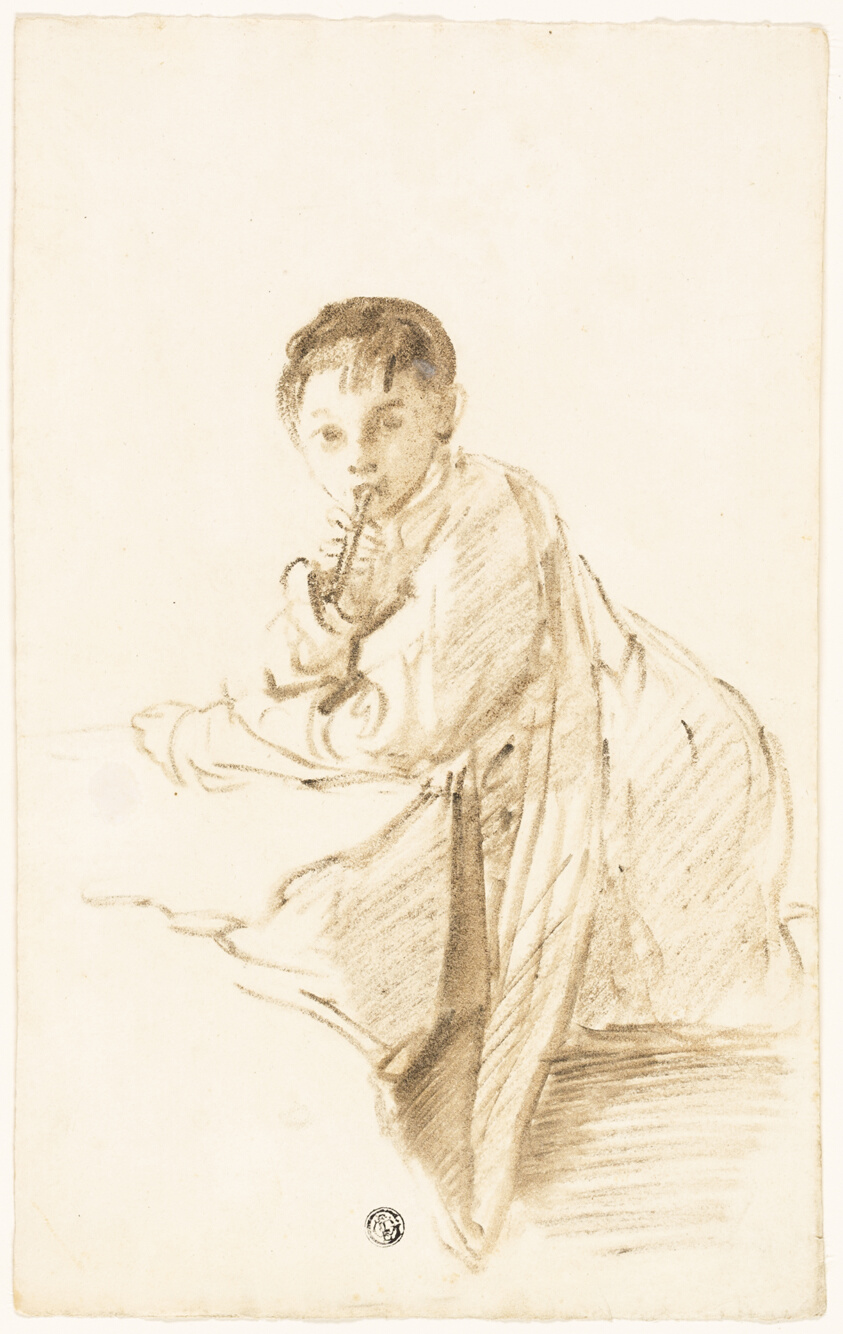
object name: Drawing and Watercolor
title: Child with Musical Instrument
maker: Attributed to Thomas Barker (English, 1769-1847); or Thomas Jones Barker (English, 1815-1882)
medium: Brown-black crayon on cream wove paper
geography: England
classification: chalk; drawings (visual works); prints and drawing